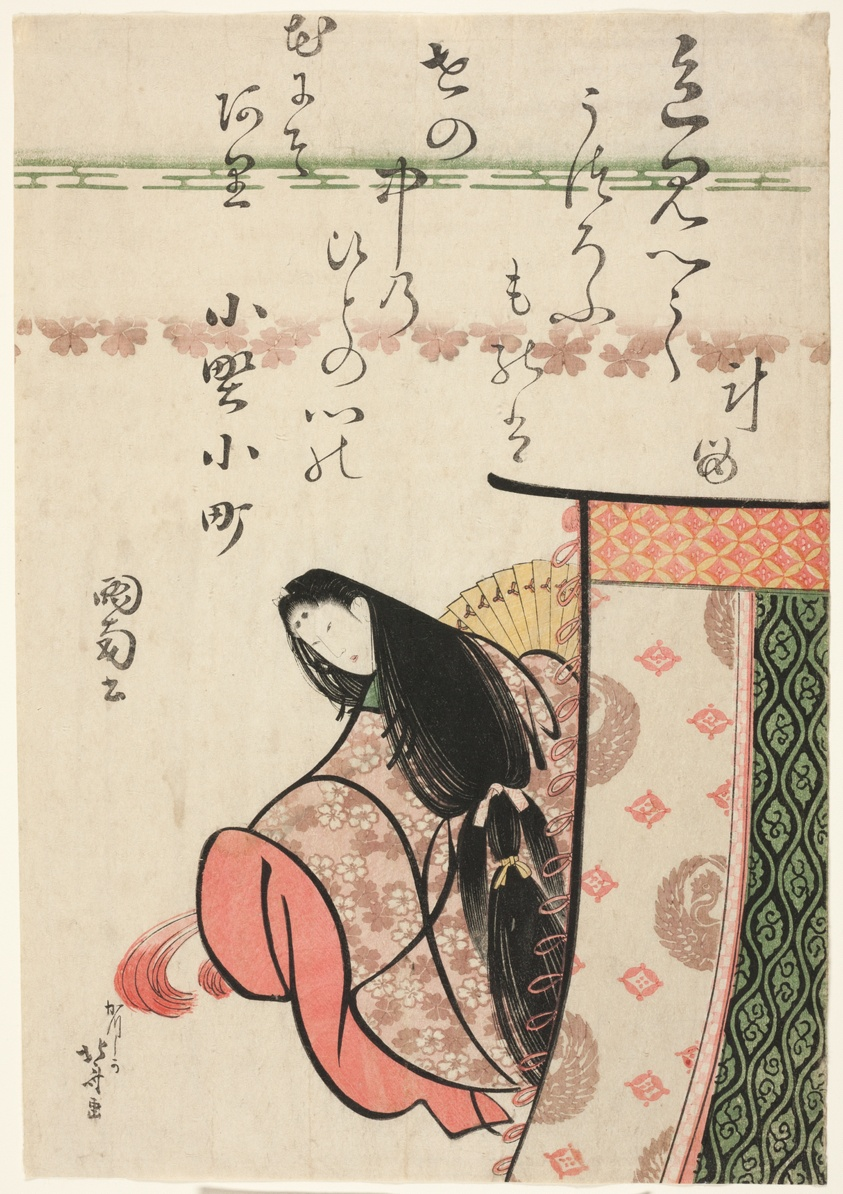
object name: Print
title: The Poetess Ono no Komachi, from the series "Six Immortal Poets (Rokkasen)"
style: Japanese (culture or style)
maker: Katsushika Hokusai 葛飾 北斎; Japanese, 1760-1849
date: Edo period (1615–1868), about 1810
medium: Color woodblock print; oban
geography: Japan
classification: woodblock print; print; asian art